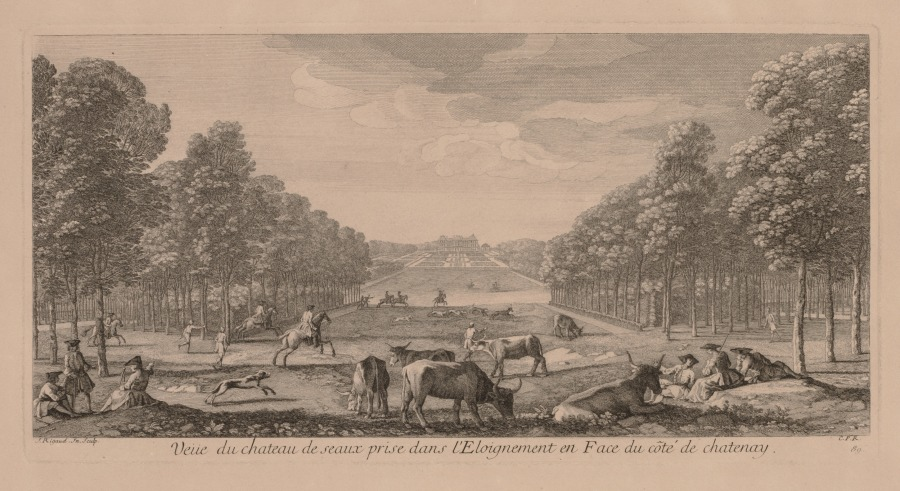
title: Chateau of Berny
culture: France, 18th century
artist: Jacques Rigaud (French, 1681–1754)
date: c. 1720–50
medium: engraving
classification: Print